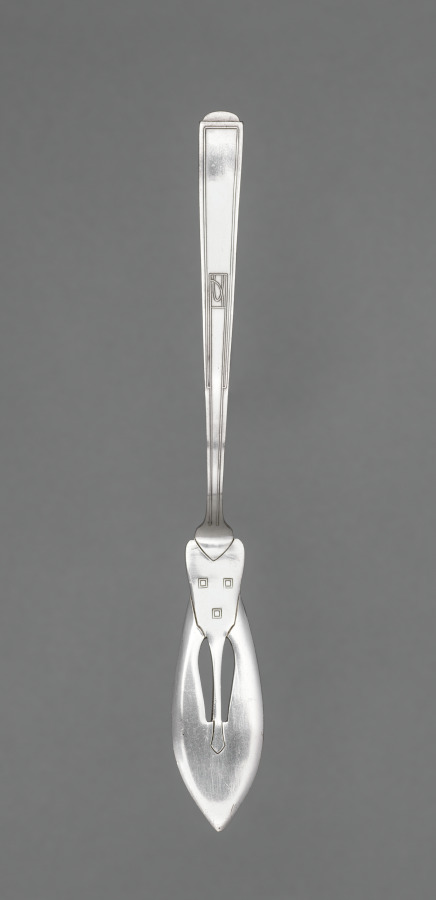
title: Fish Knife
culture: Germany, late 19th-early 20th Century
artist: Josef Maria Olbrich (German, 1867–1908)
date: c. 1900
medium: silver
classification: Silver